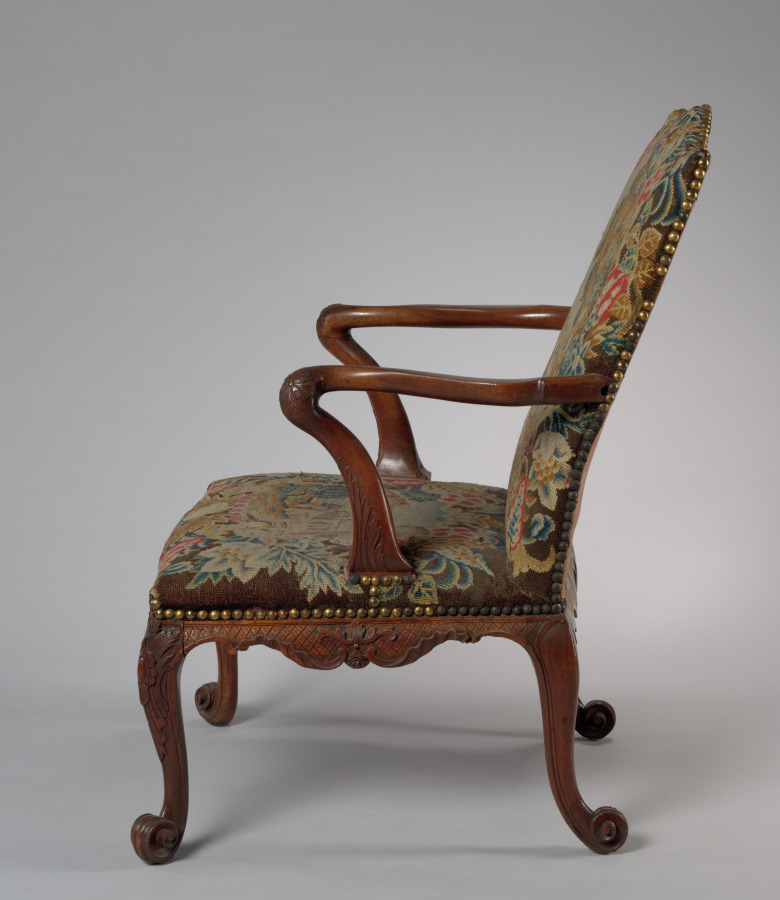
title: Armchair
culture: England, 18th century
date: 1760–1765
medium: mahogany upholstered in needlework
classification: Furniture and woodwork